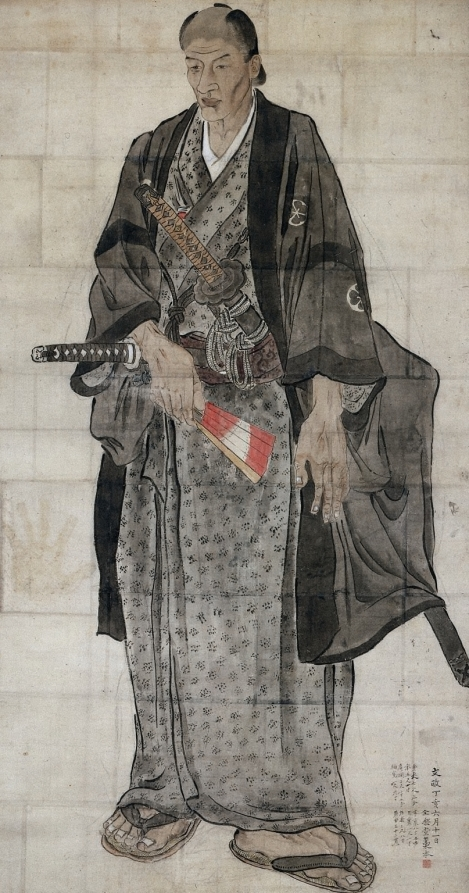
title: Portrait of Ōzora Buzaemon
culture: Japan, Edo period (1615–1868)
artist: Watanabe Kazan (Japanese, 1793–1841)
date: 1827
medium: hanging scroll; ink and color on paper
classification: Painting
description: Over seven feet tall, Ōzora Buzaemon became a tabloid sensation when he arrived in Edo (Tokyo) in 1827 . His handprints were cherished souvenirs, and his image was sold on woodblock prints. As inscriptions on the scroll detail, Watanabe Kazan met Buzaemon at the residence of a noted Confucian scholar. Using a camera obscura–type device—a tool that uses light to project an image onto a surface—he made this preliminary drawing for a painting. The portrayal depicts Buzaemon’s discomfort in being stared at.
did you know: Watanabe Kazan was interested in Rangaku (Dutch Learning).